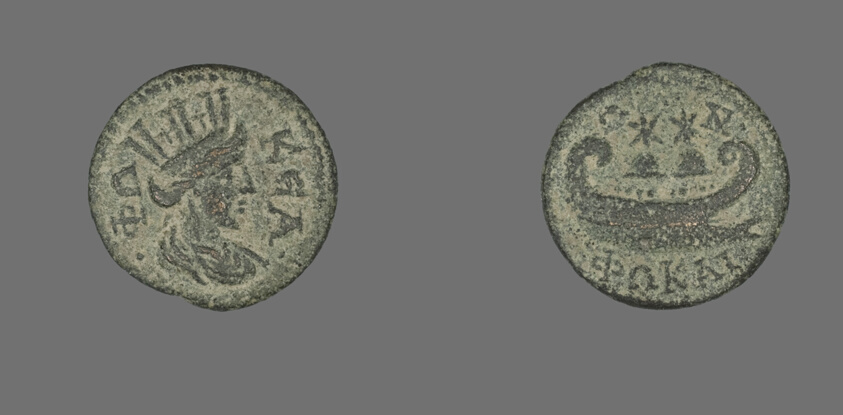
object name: Coin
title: Coin Depicting the Goddess Tyche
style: imperial (roman)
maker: Roman; minted in Phokaia, Ionia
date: 253-268 (?)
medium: Bronze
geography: Rome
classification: coin; ancient art